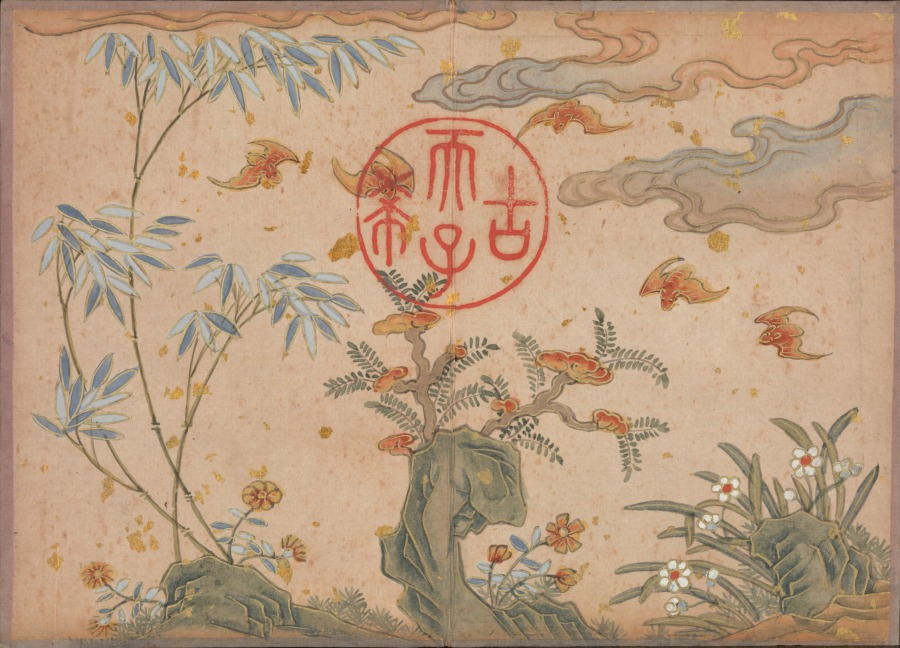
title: Desk Album: Flower and Bird Paintings (Bats, rocks, flowers circular calligraphy)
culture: China, Qing dynasty (1644-1911)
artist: Zhang Ruoai (Chinese, 1713–1746)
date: 1700s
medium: album leaf, ink and color on paper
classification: Painting